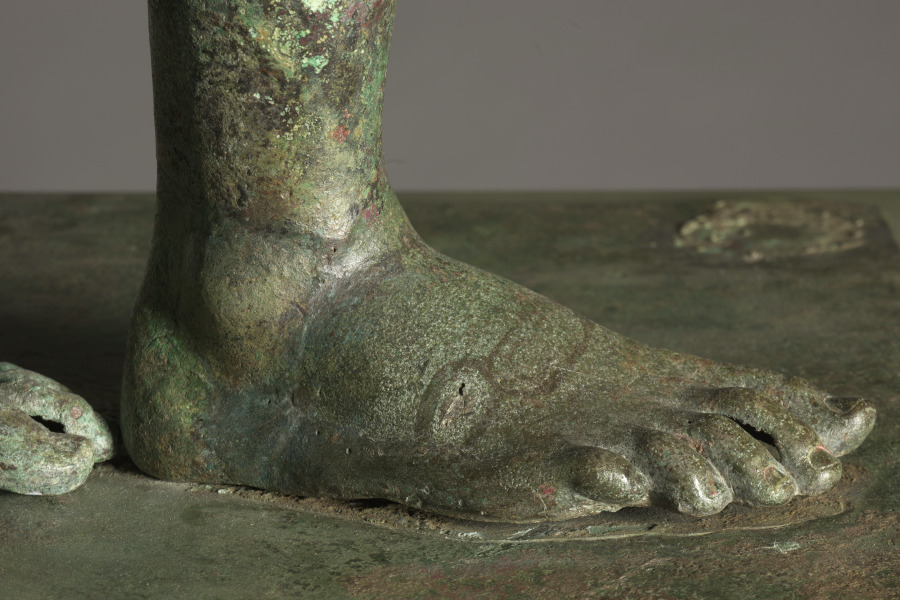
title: Baseplate for the Cleveland Apollo: Apollo Sauroktonos (Lizard-Slayer) or Apollo the Python-Slayer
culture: Greece, Athens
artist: possibly by Praxiteles (Greek, Athenian, c. 400–330 BCE)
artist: or Follower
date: c. 350–200 BCE, or possibly later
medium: bronze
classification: Sculpture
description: The baseplate is nearly square in shape, but two edges are noticeably concave. A modern hole facilitates mounting (with a modern rod in the right leg), and marks show the placement of both feet, once attached with lead solder. A nearly circular lead solder mark located at the front left corner likely corresponds to the placement of a small tree, now lost.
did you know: Most large-scale ancient bronze sculptures stood on bases made of stone rather than bronze.